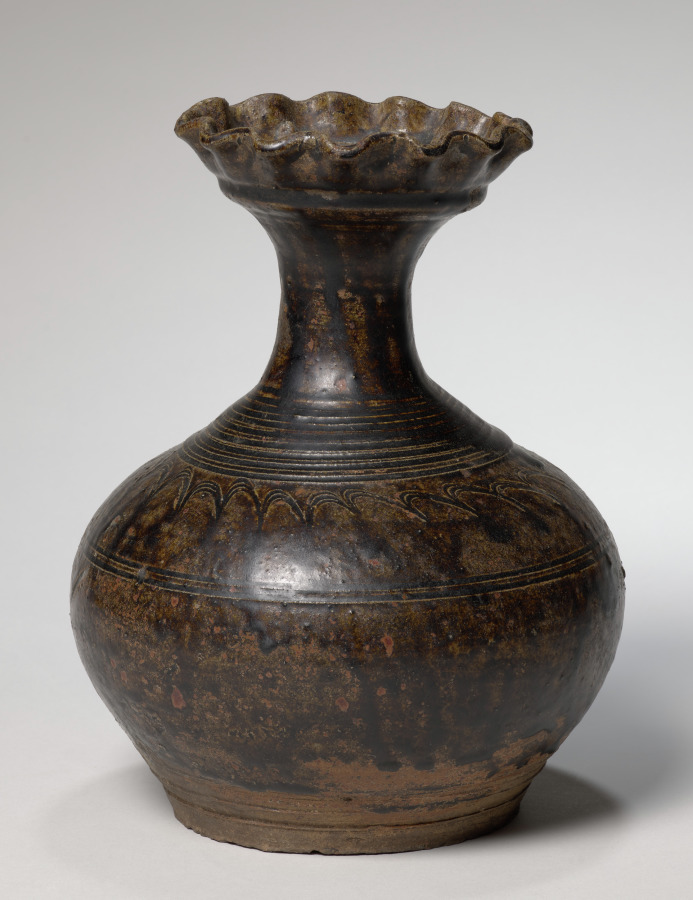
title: Khmer Vase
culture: Cambodia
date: 1100s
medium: earthenware with dark brown glaze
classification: Ceramic